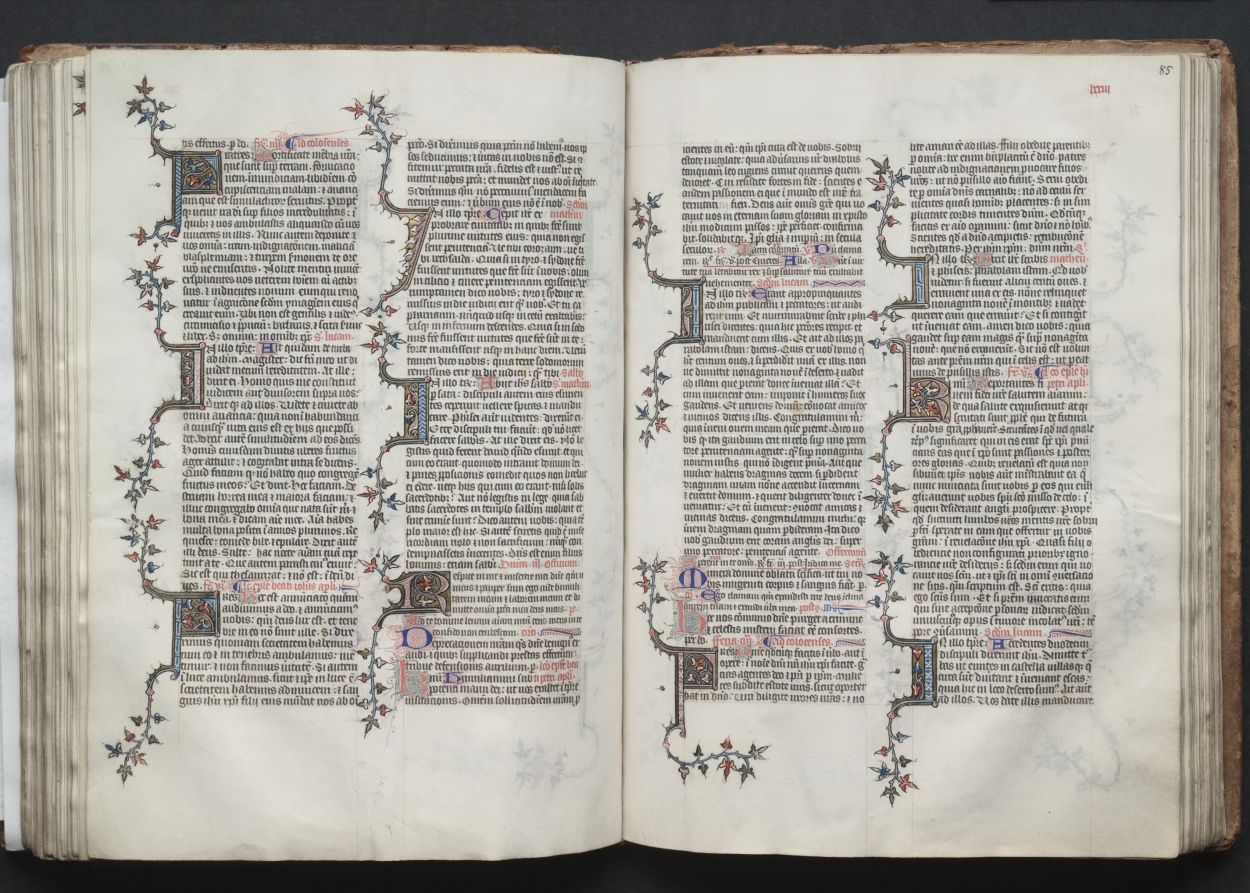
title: The Gotha Missal: Fol. 84v, Text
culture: France, Paris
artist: Master of the Boqueteaux (French)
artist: and Workshop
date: c. 1375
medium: ink, tempera, and gold on vellum; blind-tooled leather binding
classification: Bound Volume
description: The style and quality of this manuscript's decoration is typical of deluxe Parisian books made for aristocratic or royal patrons. Most of the book's decoration appears to be the work of the Master of the Boqueteaux, an artist active at the court of King Charles V (died 1380). His style was apparently shared by a number of book illuminators working in and around Paris. It is very possible that the Gotha Missal belonged to Charles V, but is not provable because the manuscript has no royal portraits and lacks a colophon. Given the book's magnificent decoration, however, it would seem that it was produced for a Valois prince, if not for the king himself. The manuscript receives its name from the German dukes of Gotha, its later owners.